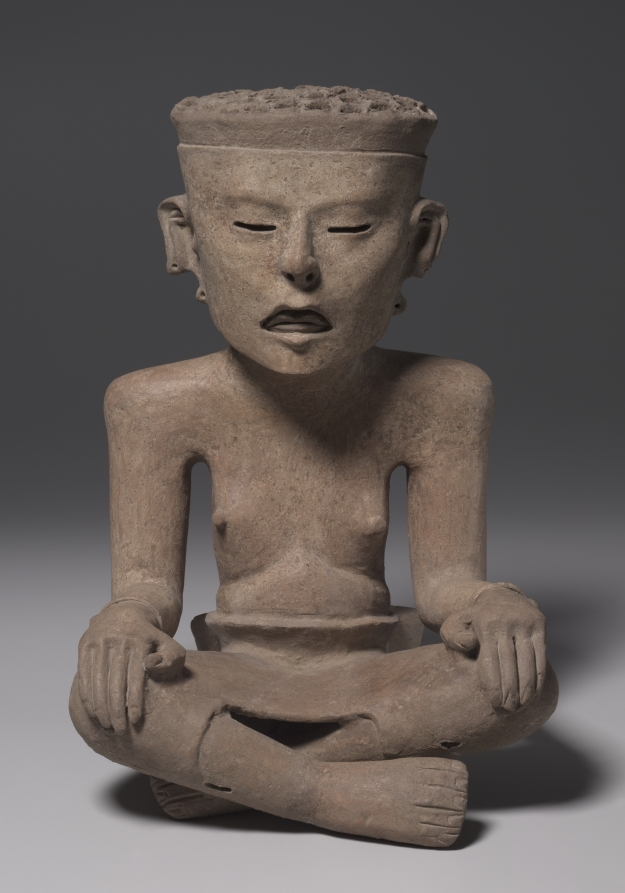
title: Seated Figure Wearing a Skin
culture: Mexico, Gulf Coast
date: 600–1000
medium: earthenware, slip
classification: Sculpture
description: This type of image-showing a human clothed in a sacrificial victim’s skin, visible around the mouth and wrists-is one of the most awesome created by Mesoamerican artists. The figure represents the deity Xipe Totec or a human impersonator. Among the later Aztecs, Xipe was associated with fertility, rain, and renewal. Perhaps the wearer, upon shedding the skin, was conceived as a sprout emerging from a withered husk. Xipe also had military connections.